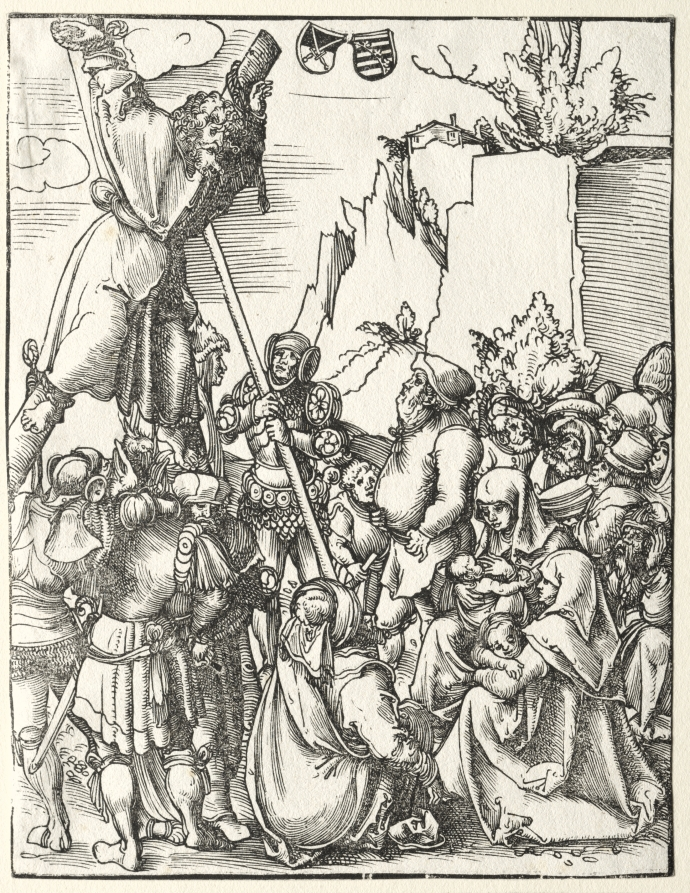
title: Martyrdom of St. Andrew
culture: Germany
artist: Lucas Cranach (German, 1472–1553)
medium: woodcut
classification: Print